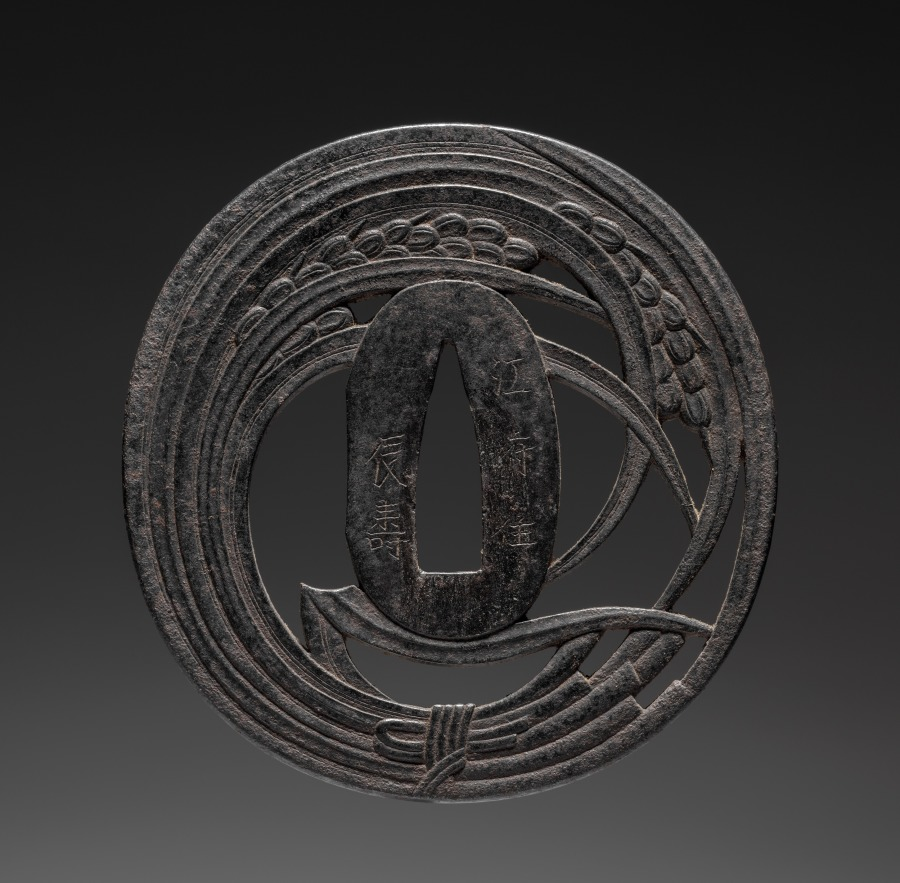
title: Sword Guard (Tsuba) with Sheaf of Rice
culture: Japan, Edo period (1615–1868)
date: early 1800s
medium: iron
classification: Arms and Armor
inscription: Signature: Tatsunaga, residing at Kofu (Edo)